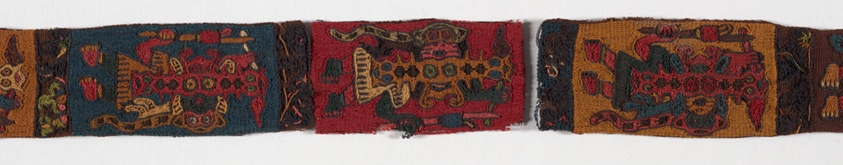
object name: Textile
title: Fragments (Border)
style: nazca, paracas, andean, andes, Pre-Columbian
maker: Nazca; Peru, south coast, Nazca Valley, Coyungo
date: 100 B.C./A.D. 200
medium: Cotton, plain weave; embroidered with camelid wool and cotton in stem and running stitches.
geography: Peru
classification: textile; needlework (visual works)